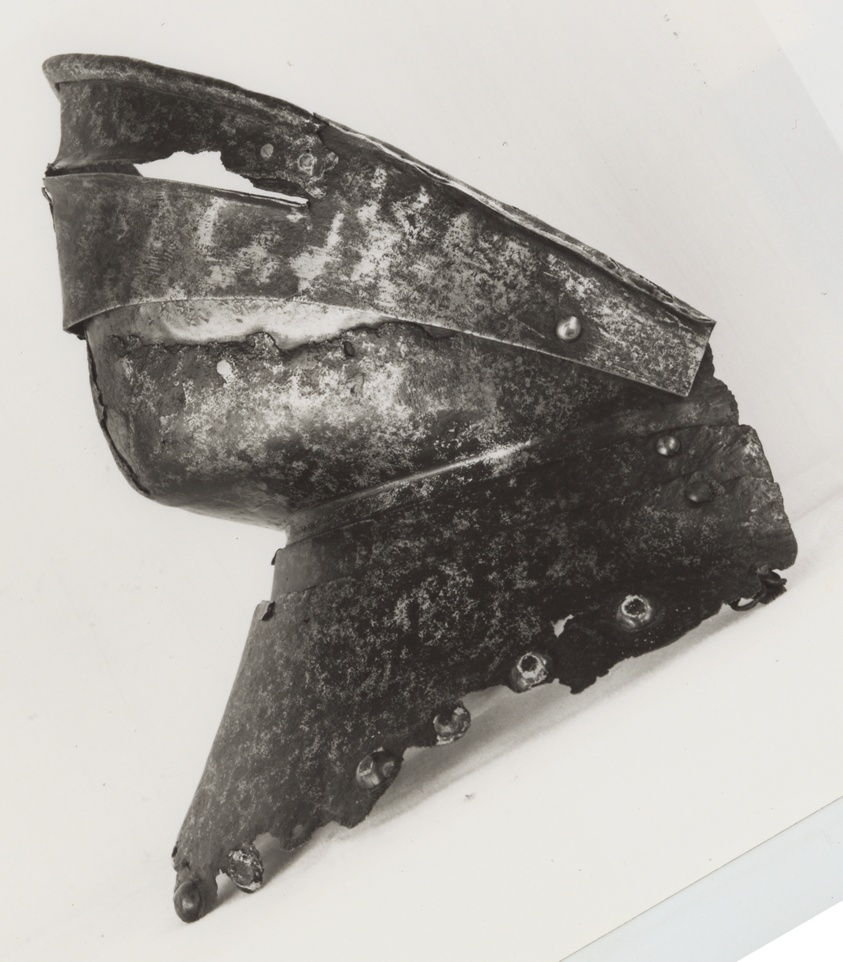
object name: Armor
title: Gorget Plate for Bevor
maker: Spanish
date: c. 1500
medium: Steel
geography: Spain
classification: suit-element; armor; arms and armor